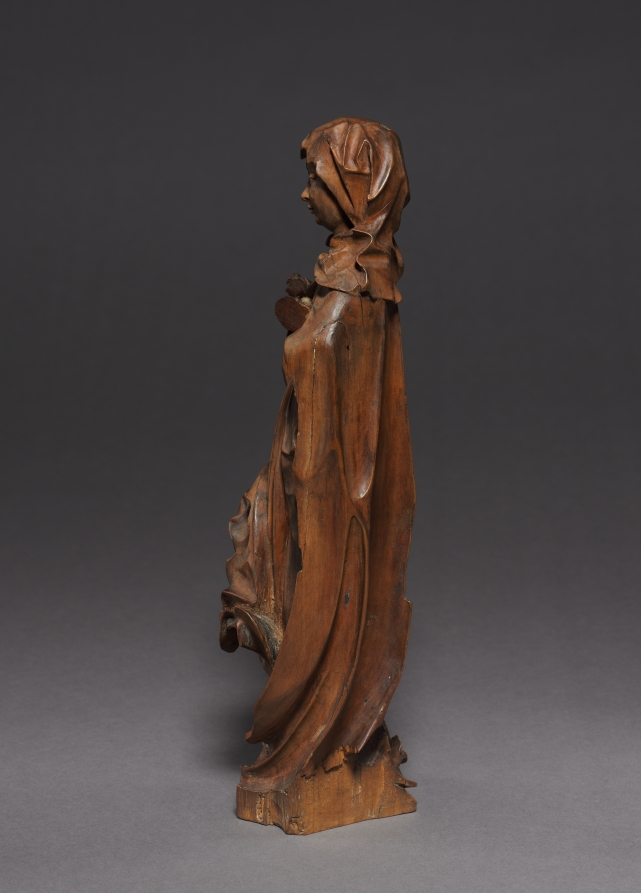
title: Mourning Virgin from a Crucifixion Group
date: about 1620/40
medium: pearwood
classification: Sculpture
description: This statuette once formed part of a Crucifixion group intended for a domestic shrine or chapel. Such ensembles were not only used for private devotion and meditation, but were also collected as works of art. This work was long attributed to the Nuremberg artist Veit Stoss. In fact, the carver imitated forms from his repertoire. However, the concave folds do not occur before 1600. The sculpture was created at a time when the appreciation for Albrecht Dürer, the most famous German painter of his time, was also experiencing a renaissance.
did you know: Looking closely, you can see that the sculptor carved tears under Mary's eyes. They show her pain over Christ hanging on the cross.